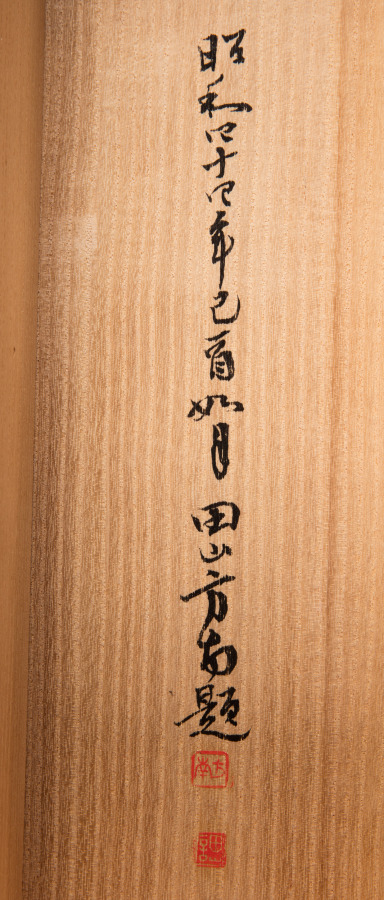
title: Reeds and Geese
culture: Japan, Kamakura period (1185–1333)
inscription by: Yishan Yining [Issan Ichinei] (Chinese, 1247–1317)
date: 1314–17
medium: hanging scroll; ink on paper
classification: Painting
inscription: signed: Issan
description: Reeds and geese has been a common pairing in Chinese literary and visual culture for many centuries. This painting presents the contribution of a Japanese amateur painter, almost certainly a Zen Buddhist monk, to Japan’s fledgling efforts to add the theme to its own cultural vocabulary in the early 1300s. As was customary at the time in Japan, the painter did not sign or seal his work; the inscription, a poem added to the painting by the eminent émigré monk Yishan Yining, along with his signature and seal, was of far greater cultural value. Today, the modestly sized painting has tremendous significance as one of the earliest surviving examples of Japanese ink paintings with reeds and geese.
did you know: Tokyo National Museum owns a copy of this painting made by Kano Gyokusen (1796–1864) when he was 14 years old.